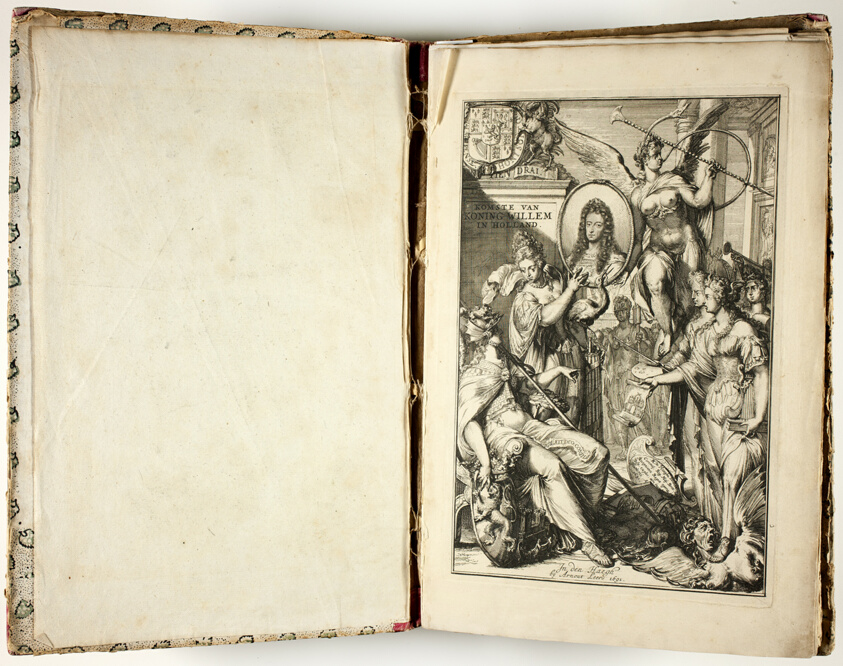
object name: Book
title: Entry of His Majesty William III, King of Great Britain, etc., in Holland; or Detailed Descriptions of Everything Related to His Arrival and Sojourn in the Hague and Elsewhere, as Decorations of Honor Were Erected Everywhere (Komste van Zyne Majesteit Willem III, Koning van Groot Britanje, enz. in Holland; ofte Omstandelyke Beschrijving van Alles, Het Welke op des Zelfs Komste en Geduurende Zyn Verblyf, in 's-Graavenhaage en Elders, ten Teeken van Vreugde en Eere, is Opgerecht en Voorgevallen)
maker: Romeyn de Hooghe (Dutch, 1645-1708) and Pieter Stevens van Gunst (Dutch, 1659-1724); after Jan Henrik Brandon (Dutch, died 1716); published by Arnout Leers (Dutch, active 1670-1699)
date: 1691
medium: Book with sixteen, eleven folded, engravings with etching and letterpress in black on cream laid paper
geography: Netherlands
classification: book; paper; prints and drawing